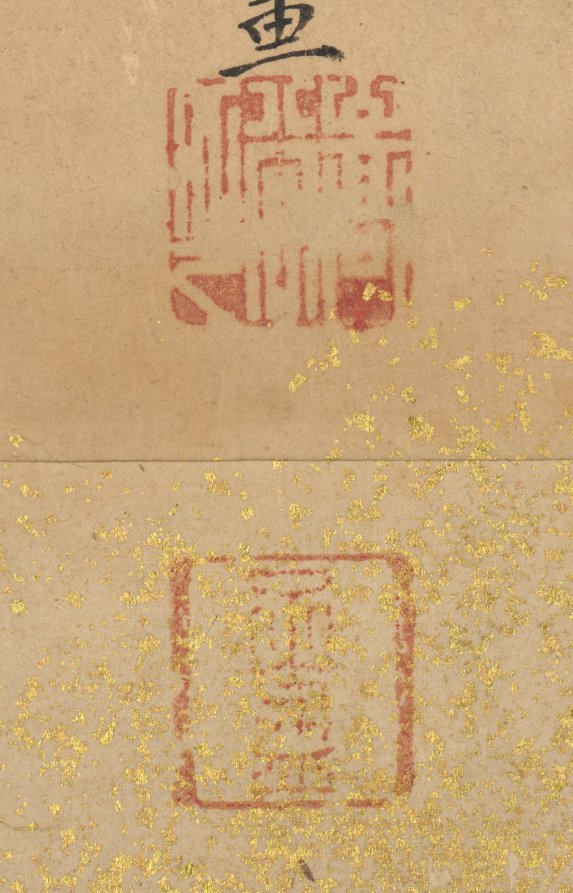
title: Spring and Autumn Farming (Autumn)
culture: Japan, Edo period (1615–1868)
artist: Kō Sūkoku (Japanese, 1730–1804)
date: 1700s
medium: Six-panel folding screen, ink, light color, gold, and silver on paper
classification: Painting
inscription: Signature of the artist: "Enrin san jin Rakushisai ko Sukoku ga" (each screen)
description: These screens present the cycle of the farming year, starting with spring at right and ending with fall at left. Close examination of these screens reveals moments of games and amusement, the enjoyment of meals as well as intellectual and spiritual pursuits interspersed among the scenes of cultivating and preparing the rice harvest. The artist Kō Sūkoku is considered the 18th-century heir in style and attitude to Hanabusa Itchō (1652–1724). Itchō’s work incorporated elements from Kano school, ukiyo-e, and literati styles of painting. Kō trained with one of Hanabusa’s pupils, Sawaki Sūshi, who was best known for scenes depicting everyday life and customs.